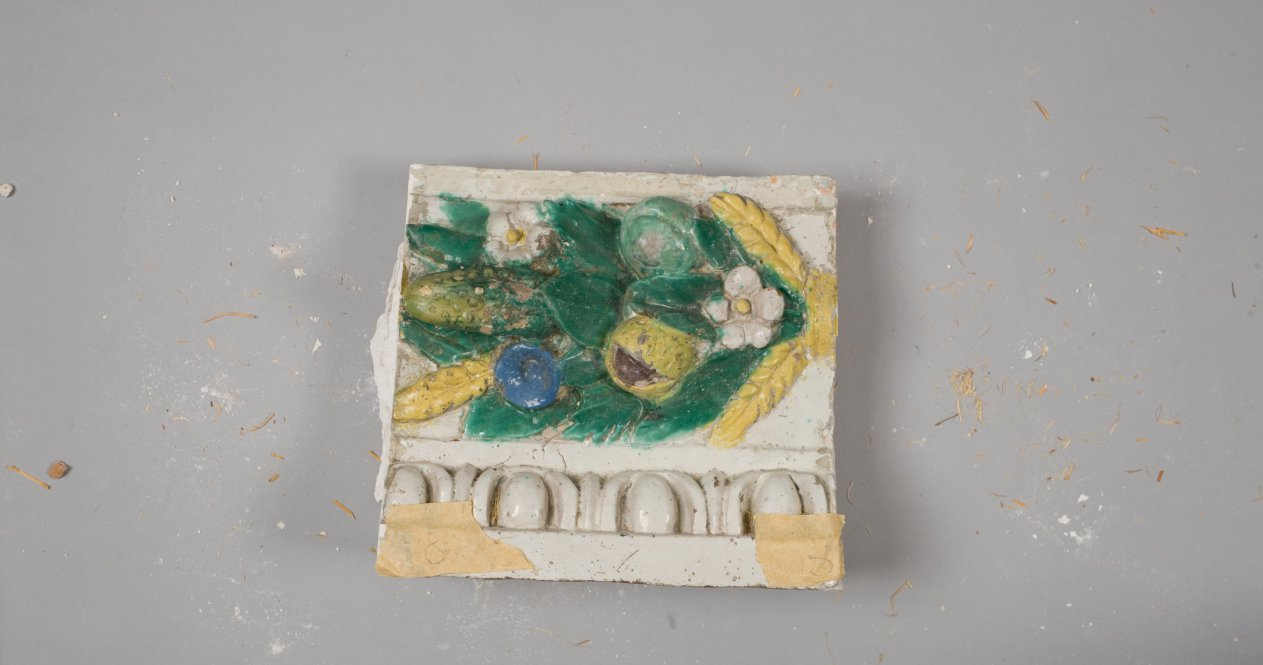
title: Fragment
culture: Italy, Florence, 16th century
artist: Benedetto Buglioni (Italian, 1461–1521)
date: c. 1900–1910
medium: glazed terracotta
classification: Sculpture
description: The Madonna sits upon a throne with the Christ Child standing on her knee. He is steadied by his mother, turning delicately to grasp the Virgin's robe for support. On the left is St. Francis, identified by his stigmata. On the right, St. Anthony Abbot is identified by his monk's robe and T-shaped walking stick. The brown robes of the saints, the purple of the Virgin's tunic (a shade characteristic of the artist), and the flesh tones of the figures contrast strongly against the bright blue background. In the semicircular sky behind the figures, three winged cherub heads emerge, representing a host of angels. The inclusion of St. Francis in this altarpiece honors the saint, suggesting that the altarpiece may have been originally built into the wall of a Franciscan institution in Tuscany. Two shields bearing the Borgherini family crest appear in the lower portion of the altarpiece's border, further suggesting that the chapel for which this altarpiece was made was likely owned or endowed by the family. Glazed terracotta is both durable and decorative and the gleaming white of this piece would have stood out in the darkness of a church. The medium was made popular by Renaissance artist Luca della Robbia and came into fashion as a substitute for expensive carved marble. A rounded arch frame embellished with fruit and flower garlands as well as egg-and-dart and cord moldings accompanied the work when it was acquired, but was later determined not to be original and removed. Buglioni's work bears the influence of the della Robbias, particularly in the simple color scheme. Buglioni likely worked in the studio of Luca's nephew, Andrea, where he would have learned the technique of glazing terracotta.